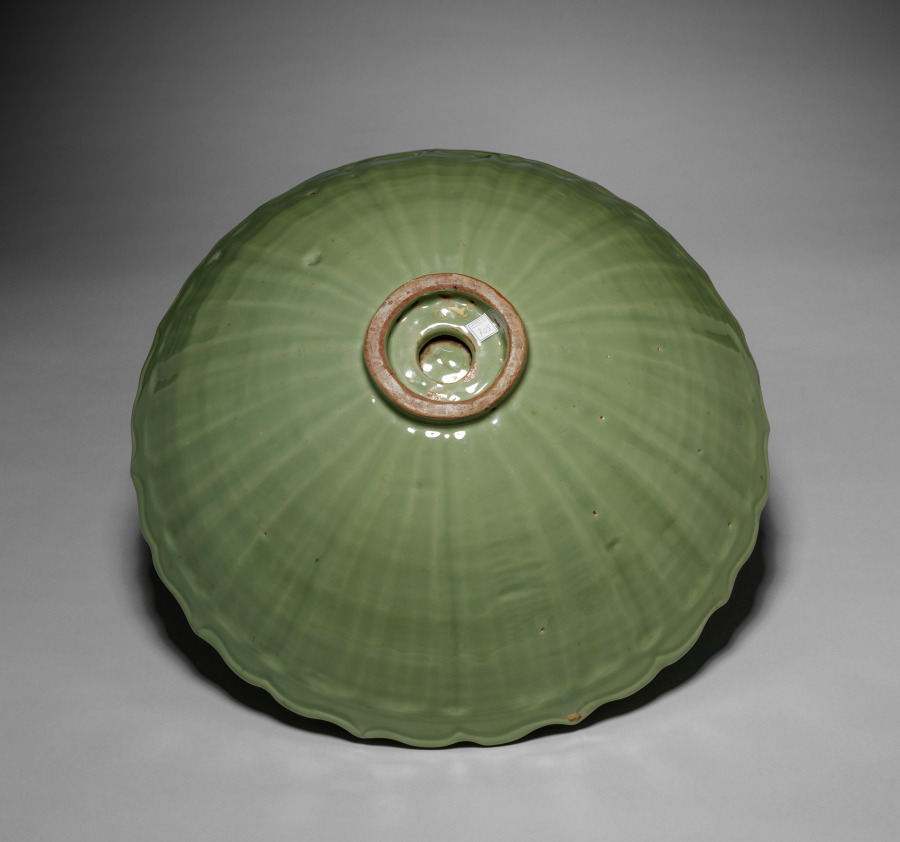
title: Large Bowl with Molded Decoration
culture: China, Zhejiang province, Longquan kilns, Ming dynasty (1368-1644)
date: 1300s–1400s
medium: Porcelaneous stoneware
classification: Ceramic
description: The lobed sides of this bowl open like a flower and rise to a solidly molded and pointed rim reminiscent of metalware. The bowl with a thick, shiny, jadelike green glaze was made by potters who mastered techniques to fire vessels of enormous sizes for the export market. Large bowls and plates were primarily shipped to the Middle East where they were used for banquets, in which food was traditionally offered in the center of a seated gathering.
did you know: Longquan celadon, or greenware, was often fired in dragon kilns, a type of narrow, sloped brick tunnel that could fire up to 25,000 pieces at a time.